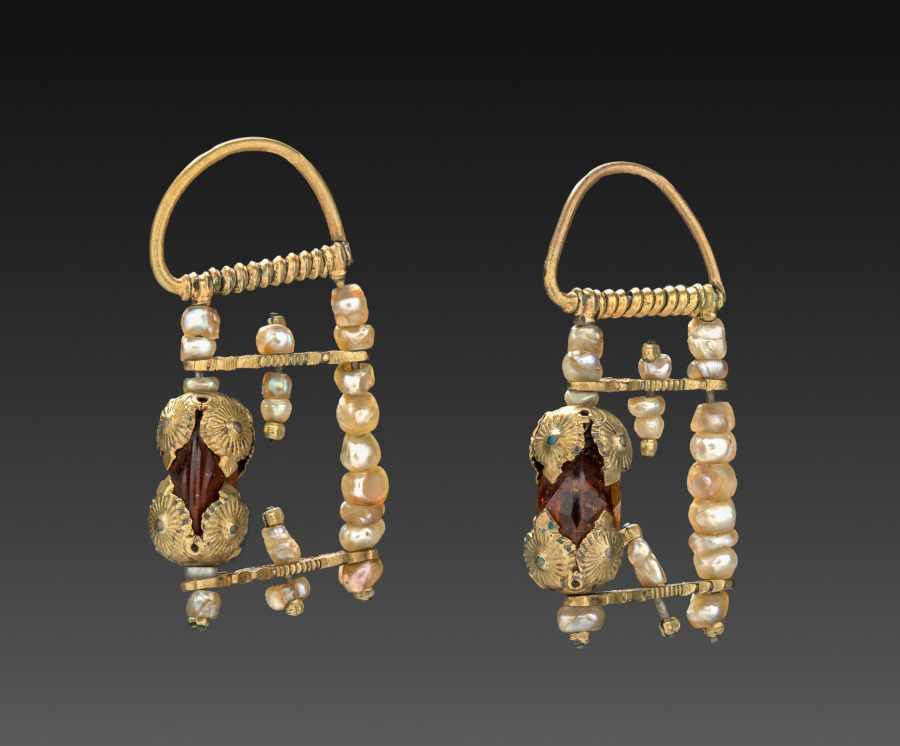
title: Pair of Earrings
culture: Russia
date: 1800s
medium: silver gilt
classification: Jewelry